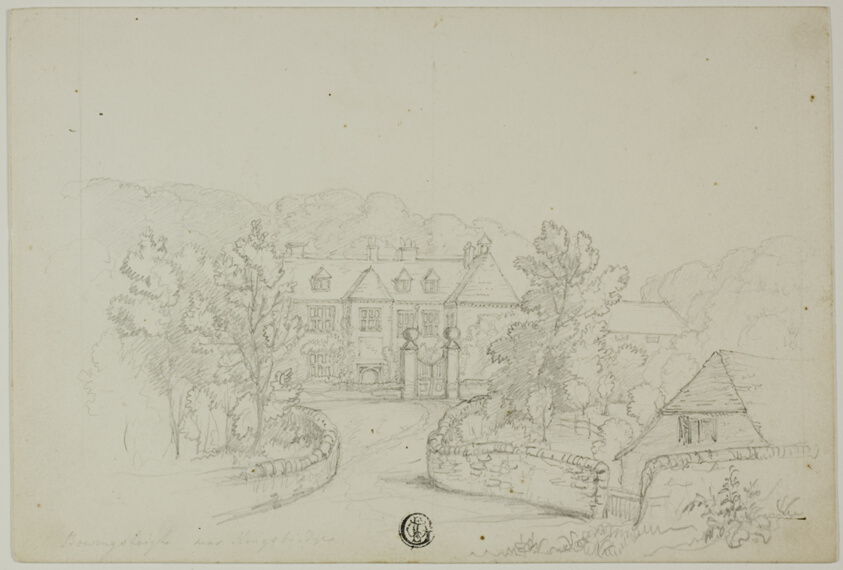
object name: Drawing and Watercolor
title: Bowingsleigh Near Kingsbridge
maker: Unknown Artist; British, n.d.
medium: Graphite on cream wove card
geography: England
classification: graphite; drawings (visual works); prints and drawing